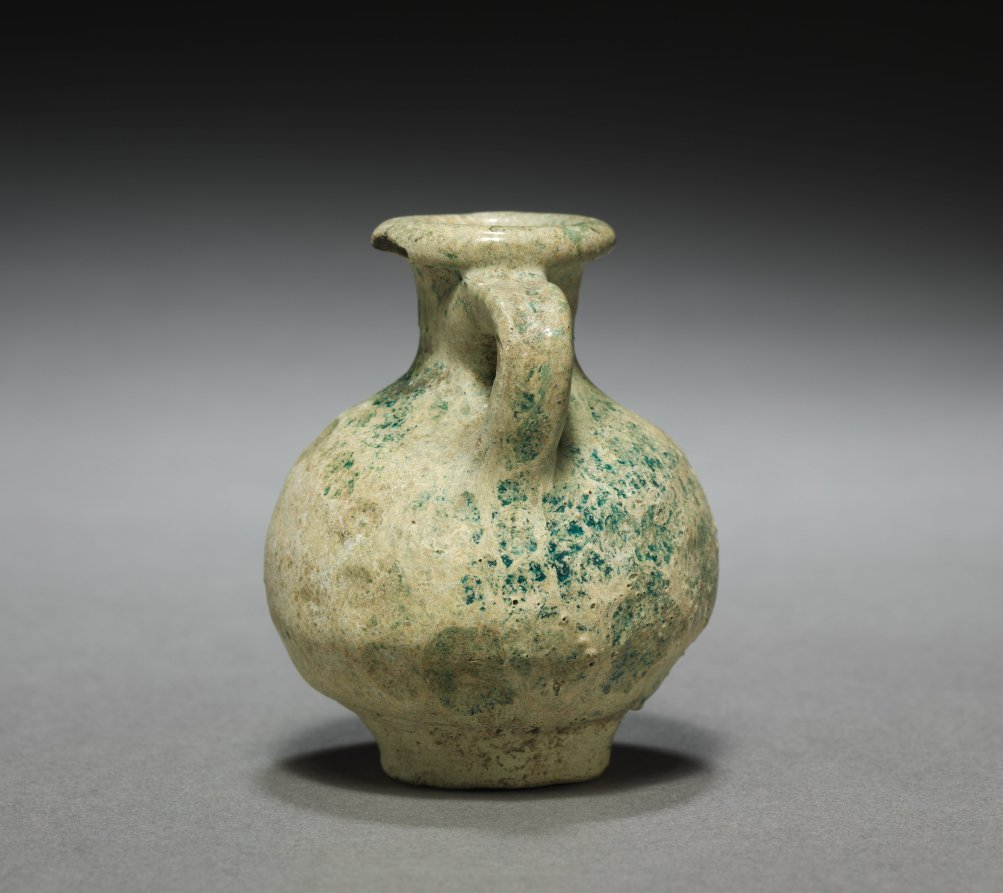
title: Jar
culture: Parthian Empire (247 BCE–224 CE)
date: 1–200 CE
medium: terracotta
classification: Ceramic